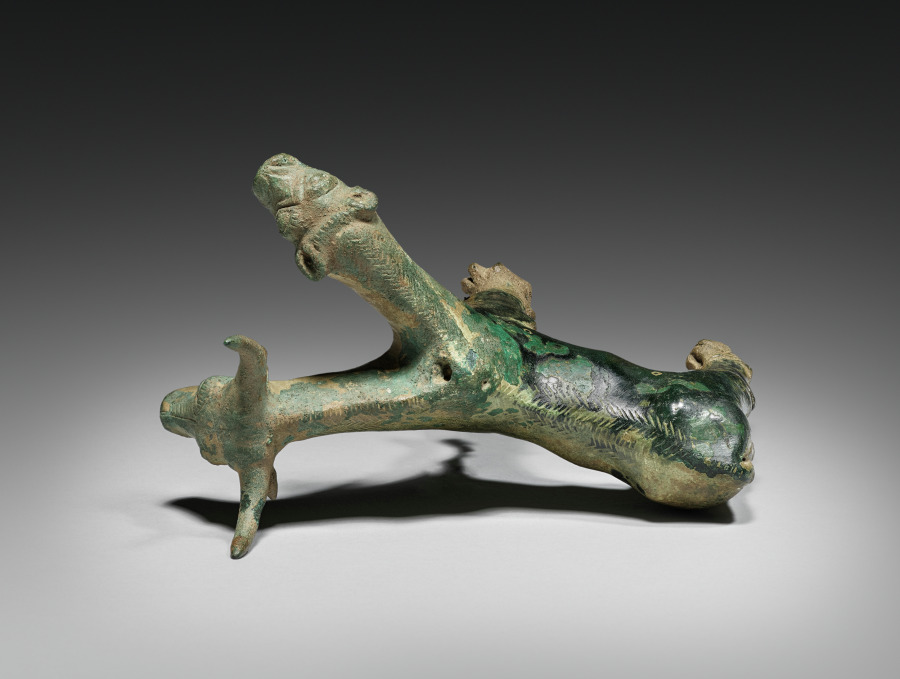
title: Composite Lion and Bull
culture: Iran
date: 1500–1000 BCE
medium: bronze, cast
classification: Sculpture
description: Combining the strength of the lion and the fertility of the bull, this creature must have served as an object of worship in a temple or shrine.